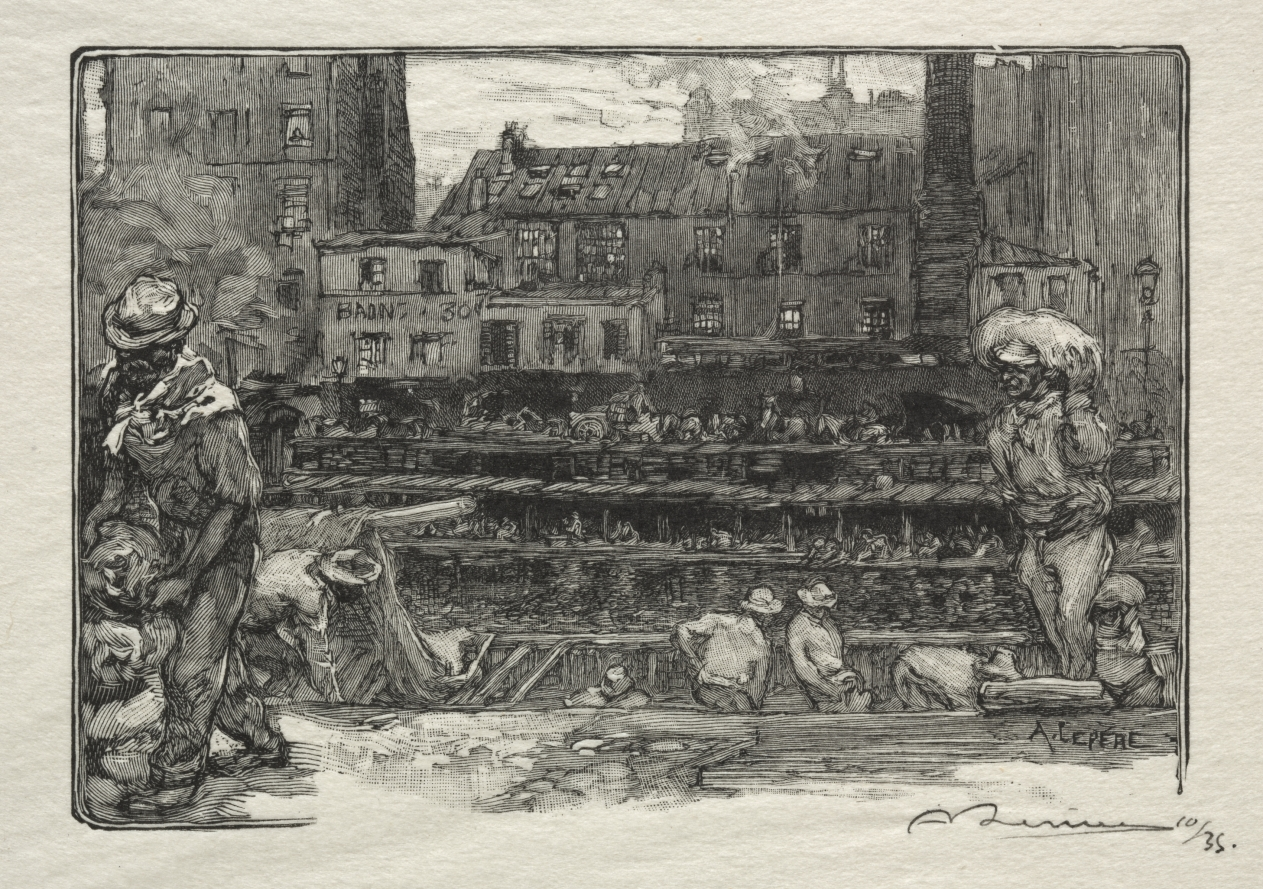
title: Les Déchargeurs de Plâtre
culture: France, 19th-20th century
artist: Auguste Louis Lepère (French, 1849–1918)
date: c. 1870–1918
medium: wood engraving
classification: Print